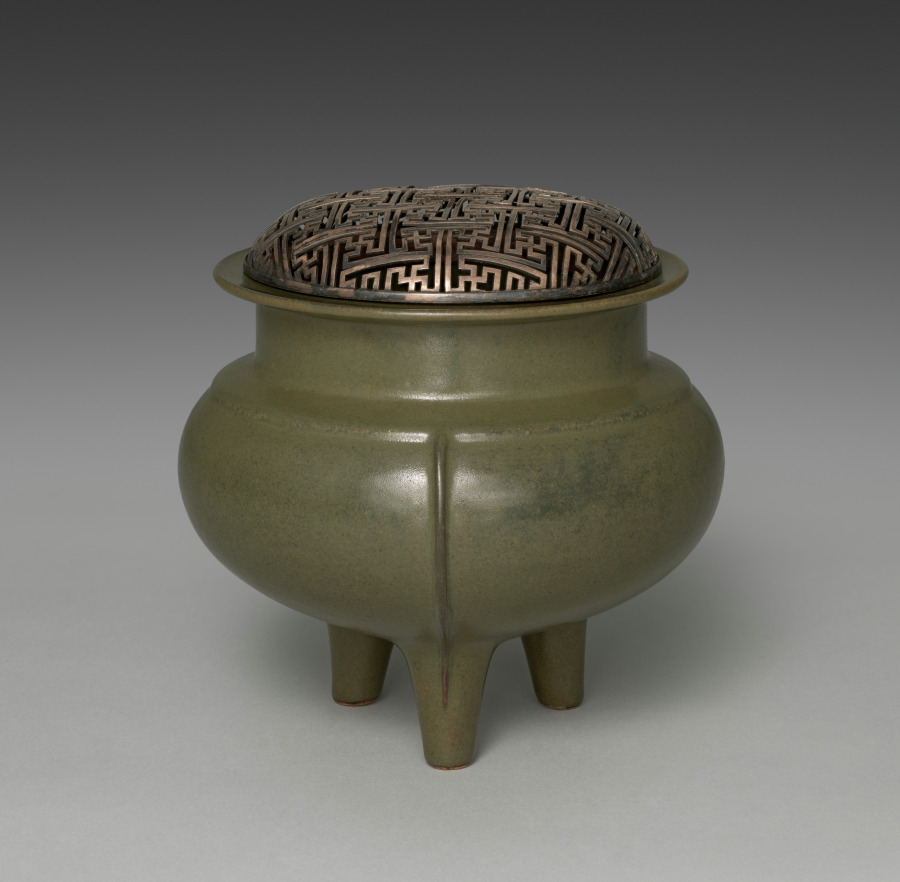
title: Incense Burner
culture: Japan, Meiji period (1868–1912)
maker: Seifū Yohei III (Japanese, 1851–1914)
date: 1895–1914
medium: Porcelain with tea-leaf colored glaze and molded design and geometric openwork silver lid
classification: Ceramic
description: Kyoto-based Japanese ceramist Seifū Yohei III (1851–1914) admired the glaze colors found on Chinese porcelain and tried to replicate them through intensive experimentation. His green and creamy white glazes were particularly well received. The combinations of colors with subtle molded and incised decorations in his ceramics respond powerfully to changes in light, creating a dynamic viewing experience. Names for the glazes, written in ink with a brush on the lids of the custom-made storage boxes for the works, often indicate a specific glaze or ware that had inspired him, even when the resulting color was distinctively his own.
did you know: This incense burner with a geometric-patterned silver lid has a glaze identified on its box lid as “tea leaf [color–glazed] porcelain” (chayōji).